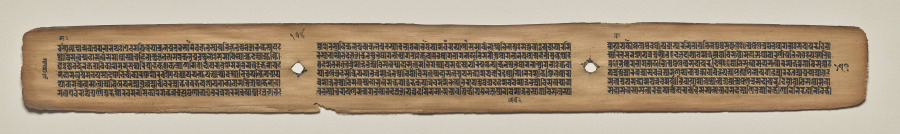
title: Text, folio 174 (verso), from a Manuscript of the Perfection of Wisdom in Eight Thousand Lines (Ashtasahasrika Prajnaparamita-sutra)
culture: Eastern India, Bihar, Vikramashila Monastery. Painting: Nepal, Kathmandu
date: Sunday, September 14, 1119 (year 239 of the Newar Samvat in the month of Ashvina)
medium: gum tempera and ink on palm leaves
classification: Painting